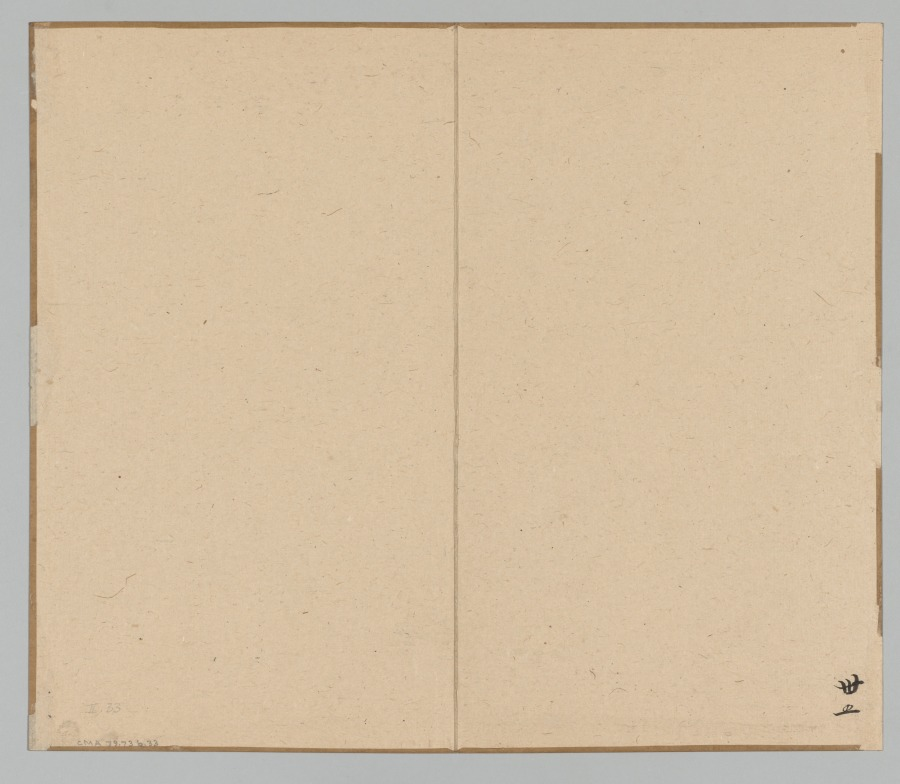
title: Reverberations of Taiga, Volume 2 (leaf 33)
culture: Japan, Edo period (1615–1868)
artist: Aoki Shukuya (Japanese, d. 1802)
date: mid- to late 1700s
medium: double-leaf from a pair of albums; ink and light color on paper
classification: Portfolio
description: Traditionally, young painters in Japan began their studies with an established master-painter. The master's compositions invariably became models that the apprentice copied to learn various ink and brush techniques. Shukuya was a pupil of the famous Kyoto artist Ikeno Taiga, whose style is reflected in these sketches of rocks, trees, and mountains.